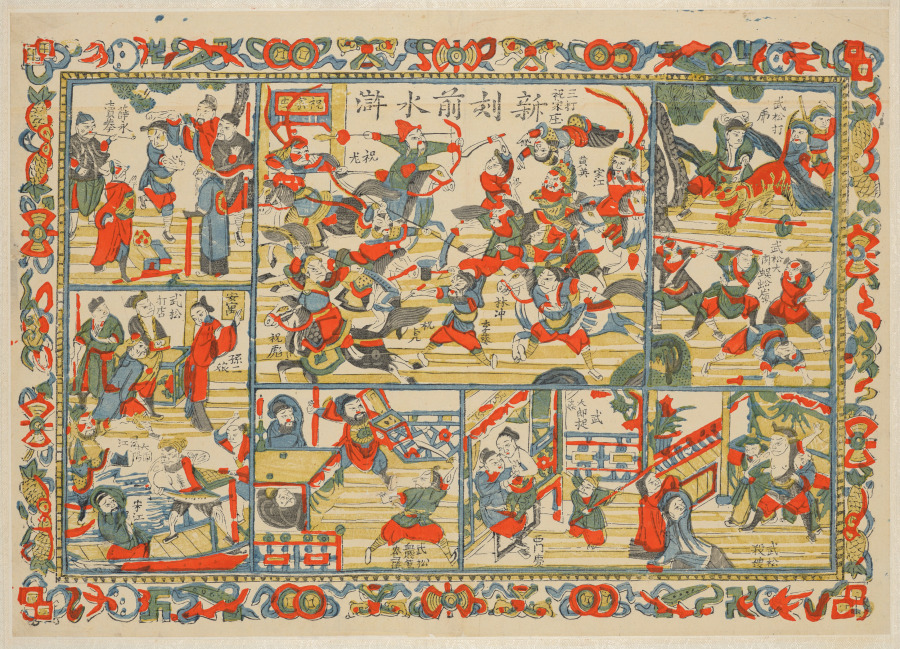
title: A Newly Cut Print: Scenes from the First Part of Outlaws of the Marsh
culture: China, Qing dynasty (1644–1911), Jiaqing period (1796–1820)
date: 1796–1820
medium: Polychrome woodblock print; ink and color on paper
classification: Print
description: In the 1600s, printing flourished in such Jiangnan cities as Nanjing, Suzhou, Hangzhou, and Huizhou, evolving from privately enjoyed illustrated books printed in color to more commercialized single-sheet color prints that were hung on walls and became part of the rich urban visual culture.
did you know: Woodblock printing in color reached a height in China in the 1600s to 1700s. The prints were executed by means of sets of separate blocks, each carved to print a different color.